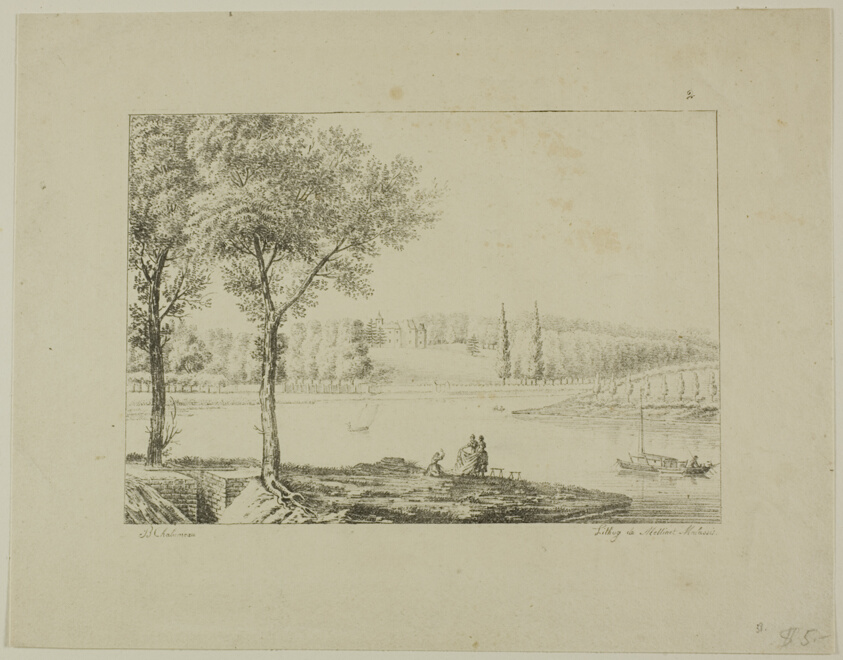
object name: Print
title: Landscape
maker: B. Chalameau (French); printed by Mellinet-Malassis (French, 1800-1899)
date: 1820–1830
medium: Lithograph in black on ivory wove paper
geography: France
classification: lithograph; print; prints and drawing